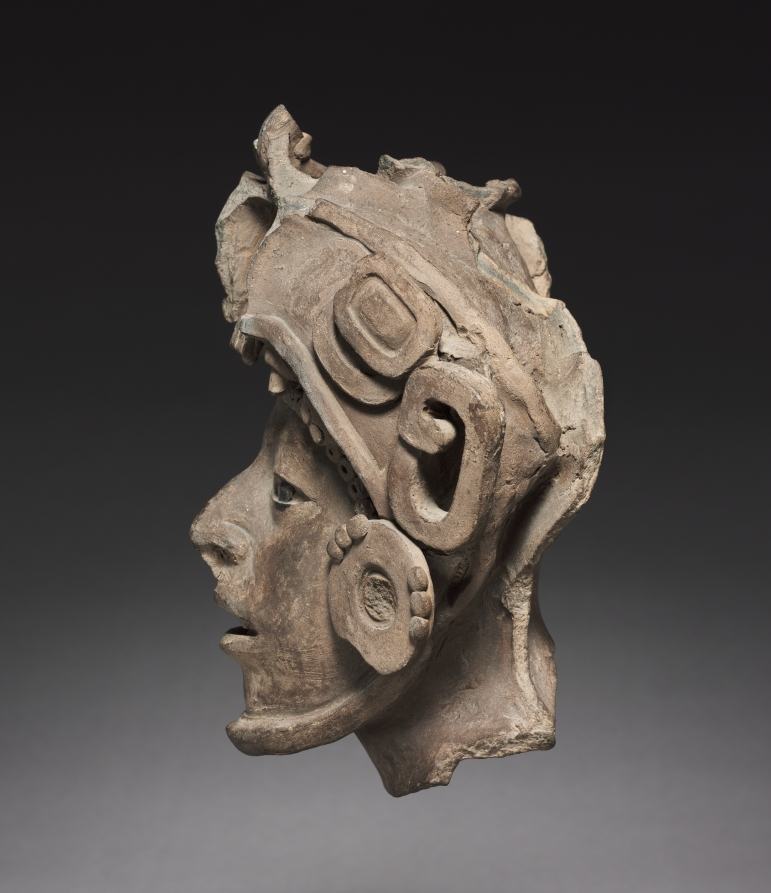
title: Head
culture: Mexico, Classic Veracruz, 7th-10th Century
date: c. 600–900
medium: earthenware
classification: Sculpture